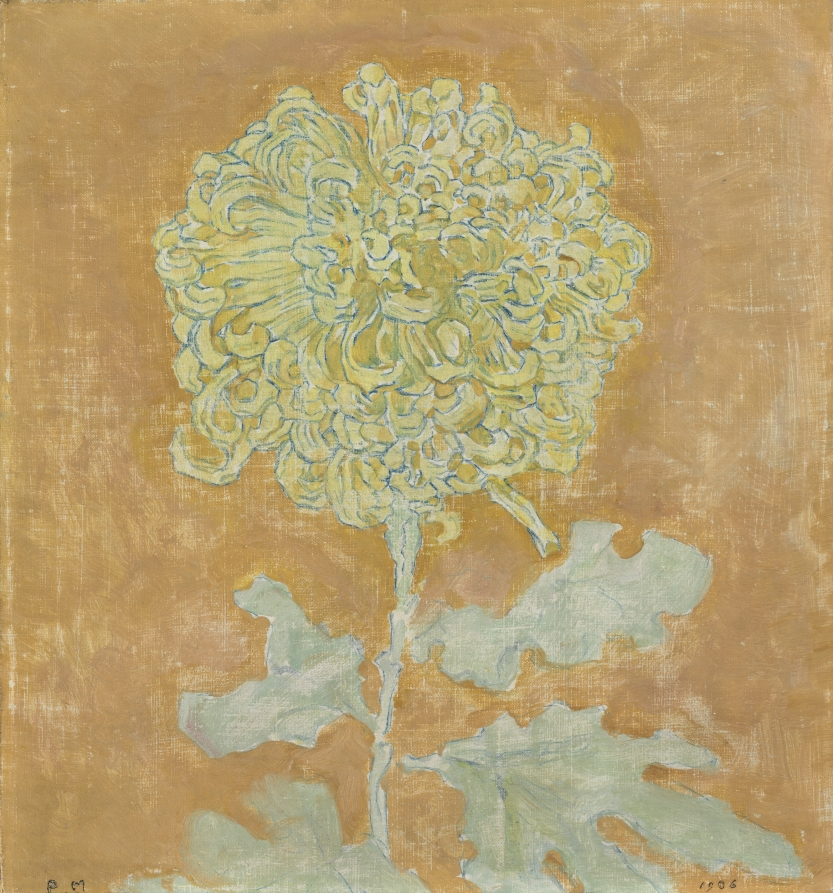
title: Chrysanthemum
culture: Netherlands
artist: Piet Mondrian (Dutch, 1872–1944)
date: 1906–42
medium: oil on canvas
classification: Painting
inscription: signed lower left: P M [inscribed lower right: 1906 (added later?)]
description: Fascinated by the complex structure of chrysanthemums, Mondrian painted these delicate flowers throughout his career. This single, frontal blossom recalls the stylized chrysanthemums of Japanese prints. Mondrian added the initials and date near the bottom edge sometime after painting the flower. Since he returned to this subject repeatedly, even during his later years, this painting may have been produced as late as 1942, the year Mondrian exhibited it in New York.